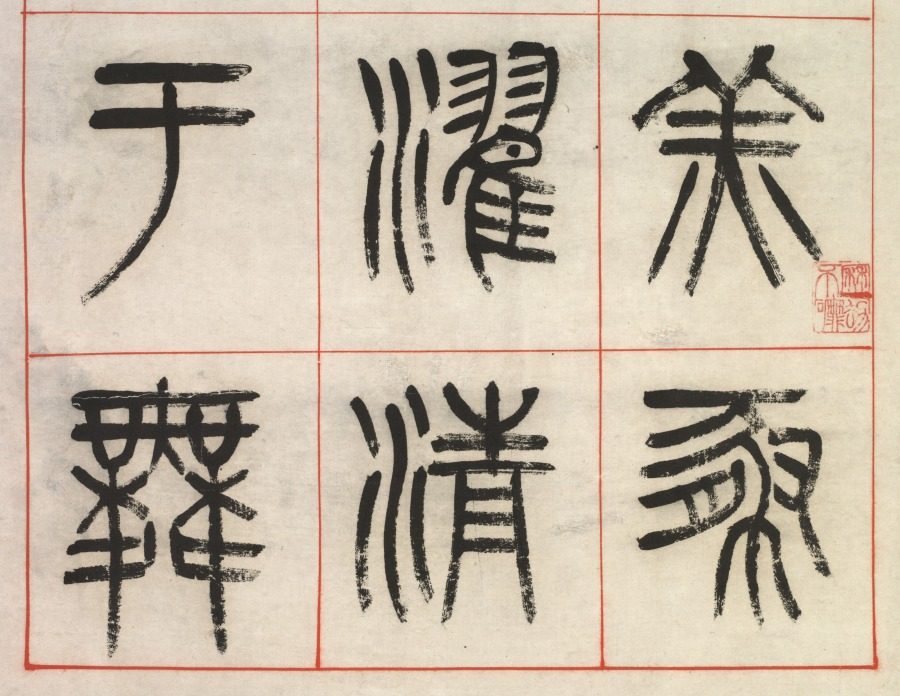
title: On Happiness, Calligraphy in Seal Script Style (zhuanshu)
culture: China, Changsu, Qing dynasty (1644-1911)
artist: Yang Yisun (Chinese, 1813–1881)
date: 1871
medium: hanging scoll, ink on paper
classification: Painting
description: Yang Yisun transcribed this ancient text on six narrow scrolls, starting at the top right and ending at the bottom left. Yang emphasizes the text’s historic nature by using the seal script style found on stone steles and bronze vessels. On Happiness features reflections of a scholar on a leisurely life in the countryside, composed by Han dynasty official Zhongchang Tong, who died the year the Han dynasty collapsed (AD 220). The idyllic life described in the text may bean evocation of the past in a time of national crisis. A decade before Yang wrote these scrolls, Anglo-French forces had looted and burned the Summer Palace in Beijing. At the same time, the domestic Taiping rebellion (1850–64), led by a religious fanatic to overthrow the Qing government, had devastated Yang’s homeland, the Jiangnan region, with an estimated 20 million lives lost.